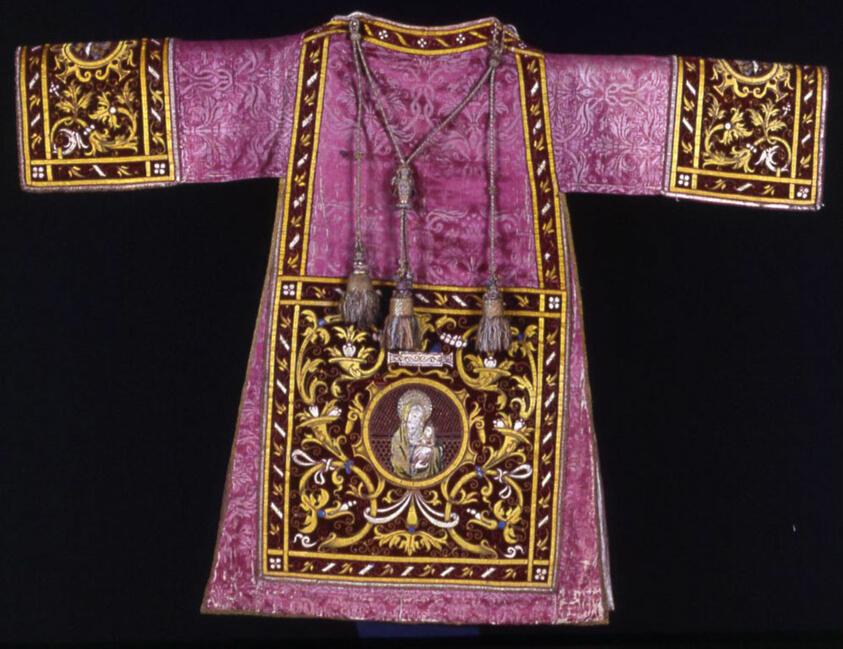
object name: Textile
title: Dalmatic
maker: Spain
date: 17th century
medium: Silk and cotton, warp-float faced 4:1 satin weave with supplementary patterning wefts; Apparels: silk, warp-float faced 3:1 broken warp chevron twill weave with supplementary pile warps forming cut solid velvet; appliquéd with warp-float faced 7:1 satin weaves; painted; embroidered with silk, gilt-metal-strip-wrapped silk, and metal wire in split stitches; laid work and couching; edged with braid of silk and gilt-metal-strip-wrapped silk, plain weave with silk, gilt-metal-strip-wrapped silk, plain weave with supplementary patterning wefts and extended weft uncut fringe; with silk and gilt-metal-strip-wrapped silk, square braided, wrapped and knotted cords and silk, gilt-metal-strip-wrapped silk, square braided, wrapped, knotted and fringed tassels worked over cotton core; underlined with linen and sisal, plain weaves; lined with linen, plain weave; glazed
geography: Spain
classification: needlework (visual works); costume; liturgical; weaving; textile